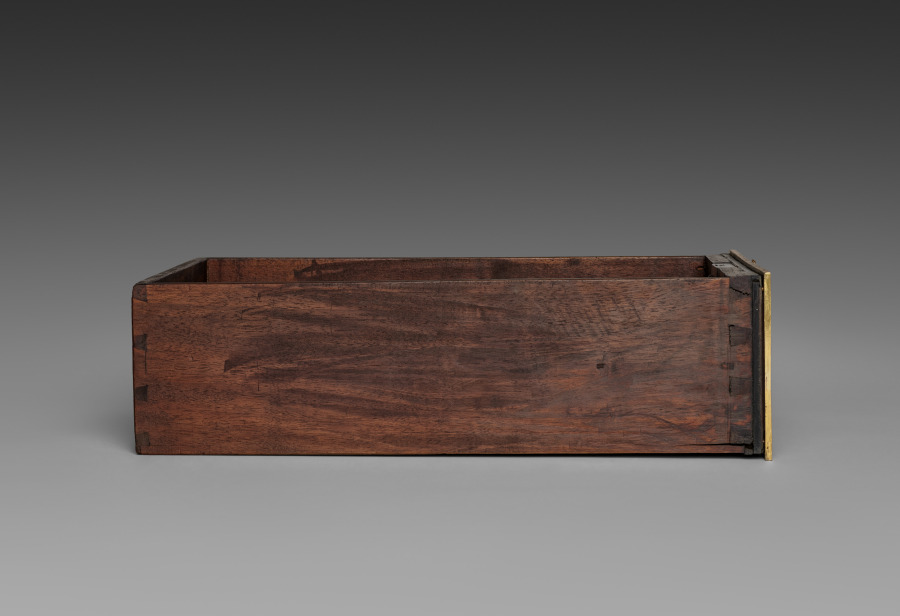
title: Side Drawer for Cabinet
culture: France, late 17th Century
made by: André-Charles Boulle (French, 1642–1732)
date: c. 1690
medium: ebony, marquetry in metal and tortoise shell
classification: Furniture and woodwork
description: Appointed cabinetmaker to King Louis XIV in 1672, André-Charles Boulle became a master of furniture making in France during the late 1600s until his death in 1732. Known primarily for his use of marquetry, in which metal patterns are inlaid into tortoiseshell then applied within the veneered surface of the furniture, Boulle established a level of quality and craftsmanship few others could achieve. As a result, his work found favor at the royal court and among other aristocrats and diplomats eager to impress the king. The inclusion of a medallion depicting Louis XIV within the bronze decoration of this chest would have identified the owner with the royal court. Often exhibiting stout architectural proportions with elegant groups of inlaid motifs such as the parrot on the central panel of this chest, Boulle’s designs are an example of the intellectual fashion for contrasting ideas, materials, and motifs.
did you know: Originally designed to sit atop an elaborate tall stand, this chest was likely altered in the late 1700s to reduce its scale and height.